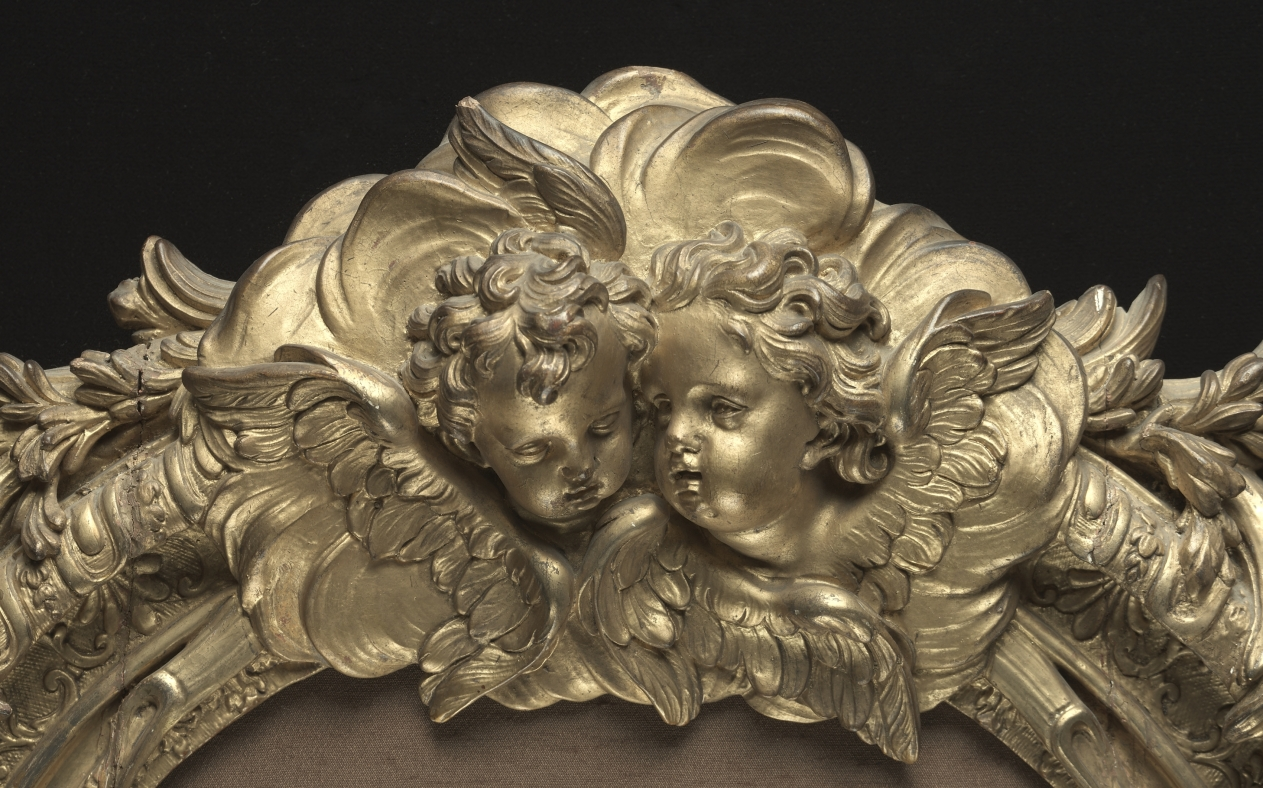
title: Frame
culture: France, early 18th Century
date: c. 1710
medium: carved and gilt wood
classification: Furniture and woodwork